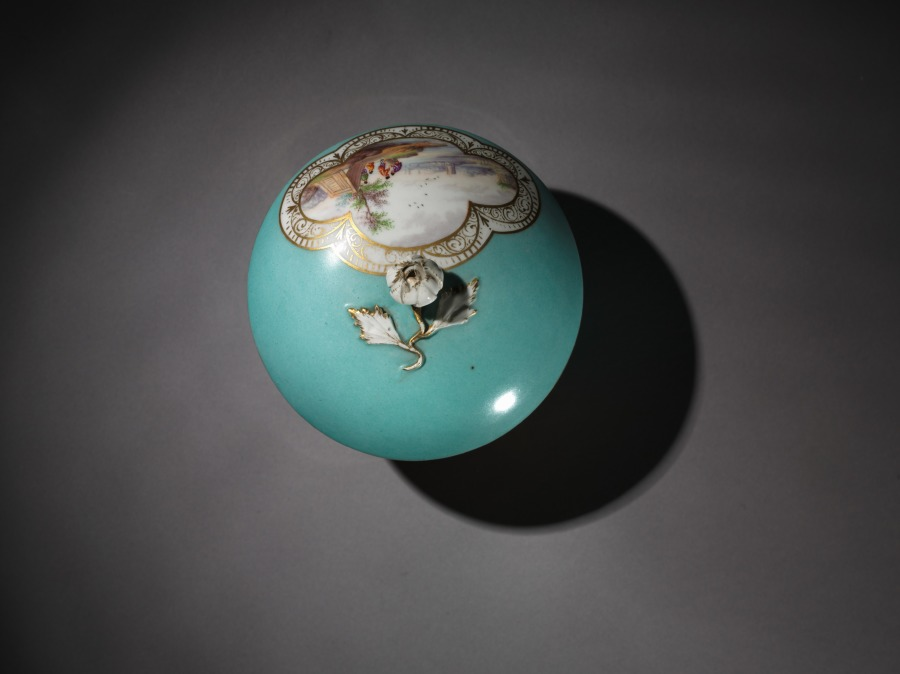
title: Sugar Bowl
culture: Germany, Meissen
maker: Meissen Porcelain Factory (German, est. c. 1710)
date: c. 1750–70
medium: porcelain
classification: Ceramic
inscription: Half moon mark on the bottom.